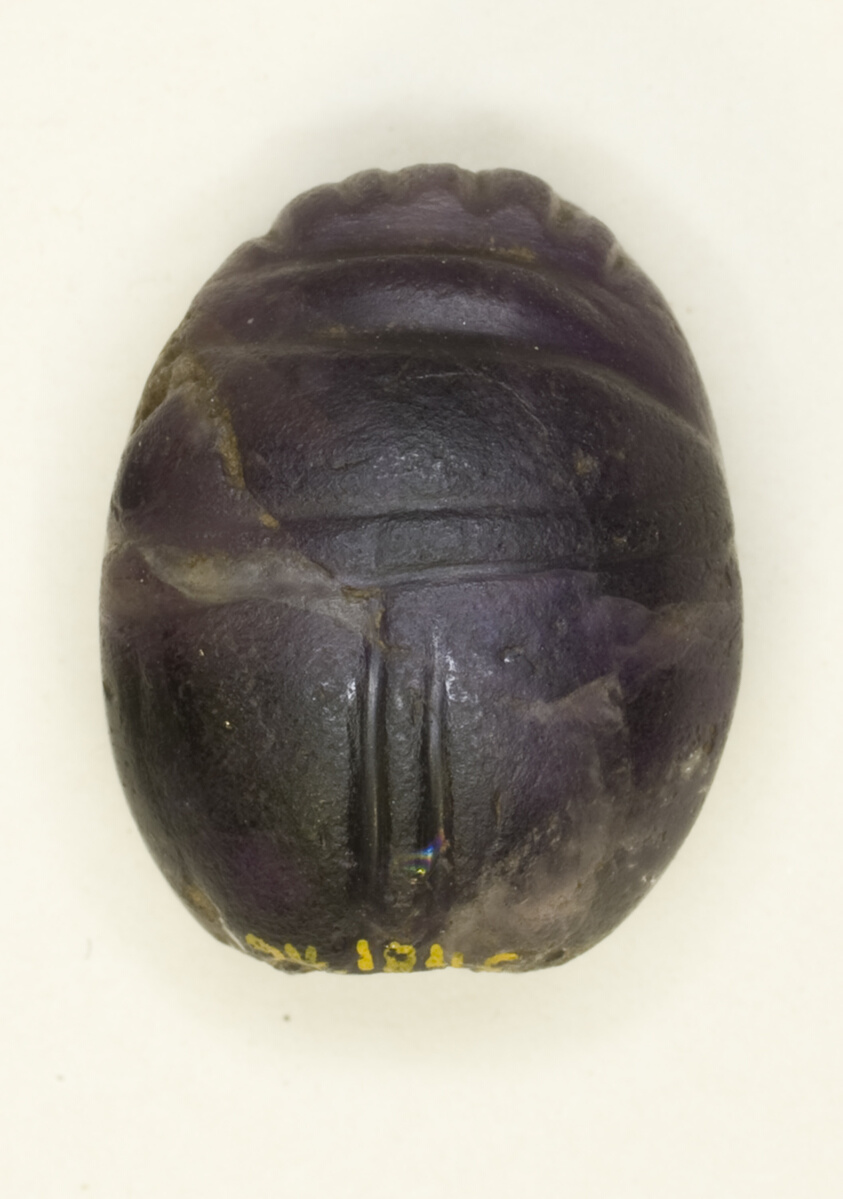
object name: Costume and Accessories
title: Scarab: Uninscribed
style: middle kingdom, egyptian, ancient, twelfth dynasty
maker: Egyptian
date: Middle Kingdom, Dynasty 12 (about 1985–1773 BCE)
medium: Amethyst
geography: Egypt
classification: scarab; stone; ancient art; costume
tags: scarab beetle